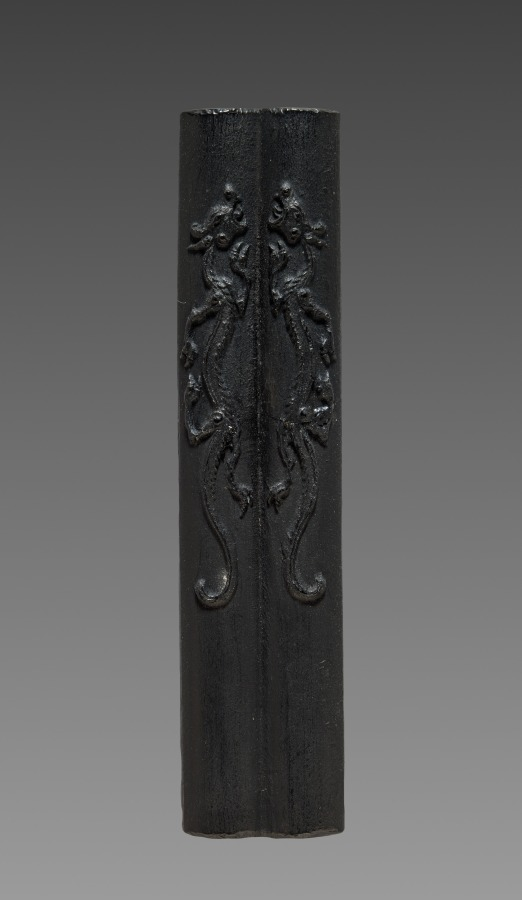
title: Ink Cake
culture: China, Qing dynasty (1644-1911)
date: 19th Century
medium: ink cake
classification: Miscellaneous